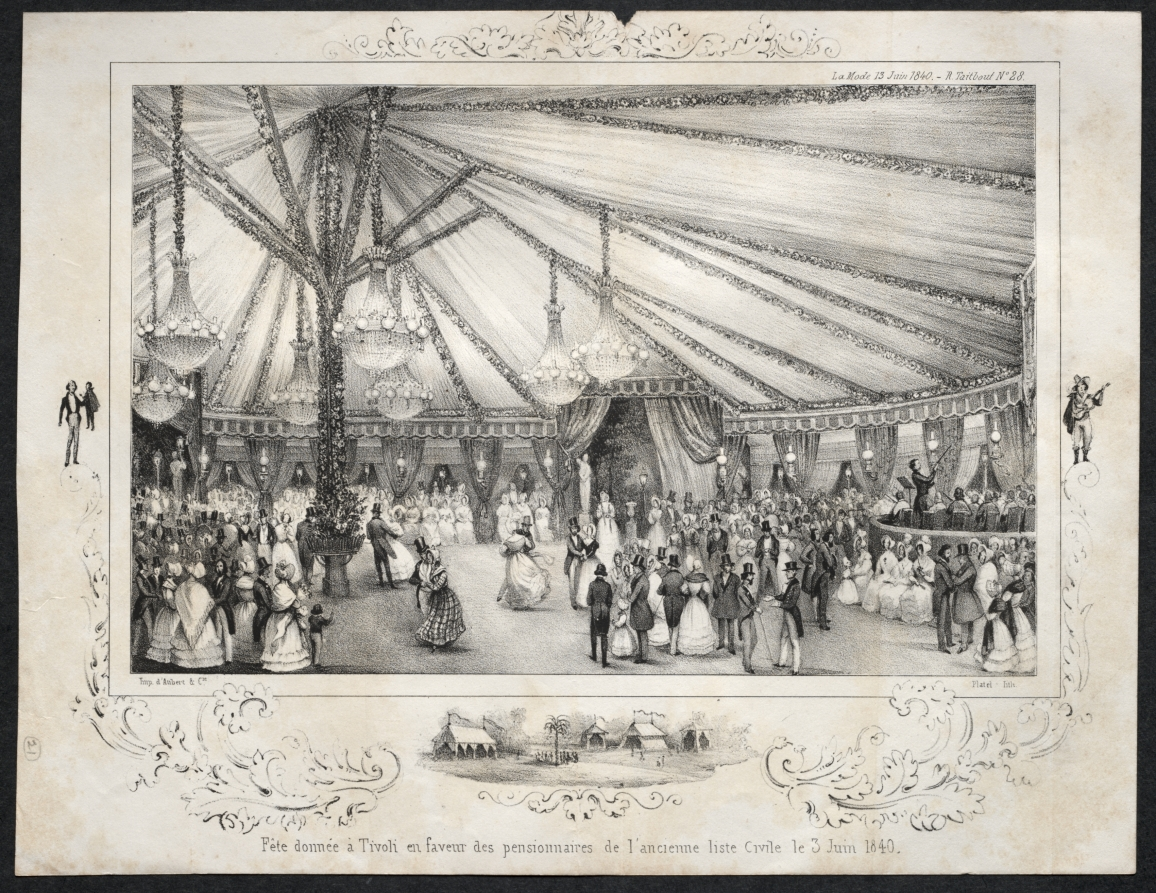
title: Fête donnée à Tivoli en faveur des pensionnaires de l'ancienne liste civile le 3 Juin 1840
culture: France, 19th century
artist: Jules Platier (French)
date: 1840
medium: lithograph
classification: Print